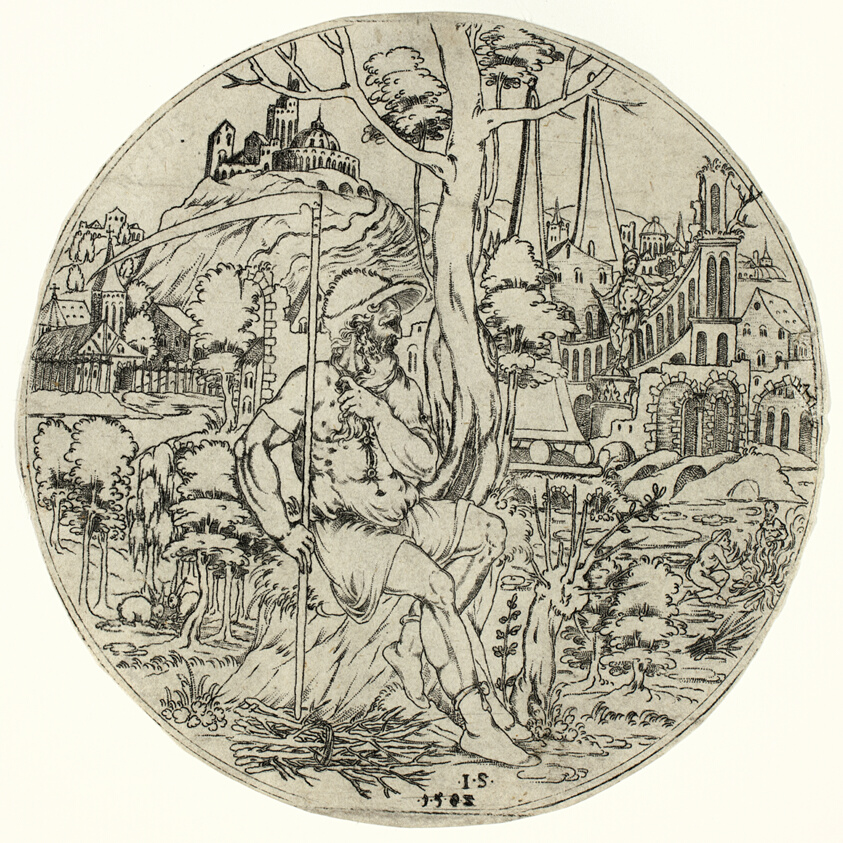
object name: Print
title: Circular Design with Saturn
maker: Jonas Silber (Master J.S.); German, active 1572-1590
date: 1583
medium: Punched engraving on buff laid paper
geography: Germany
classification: engraving; print; prints and drawing